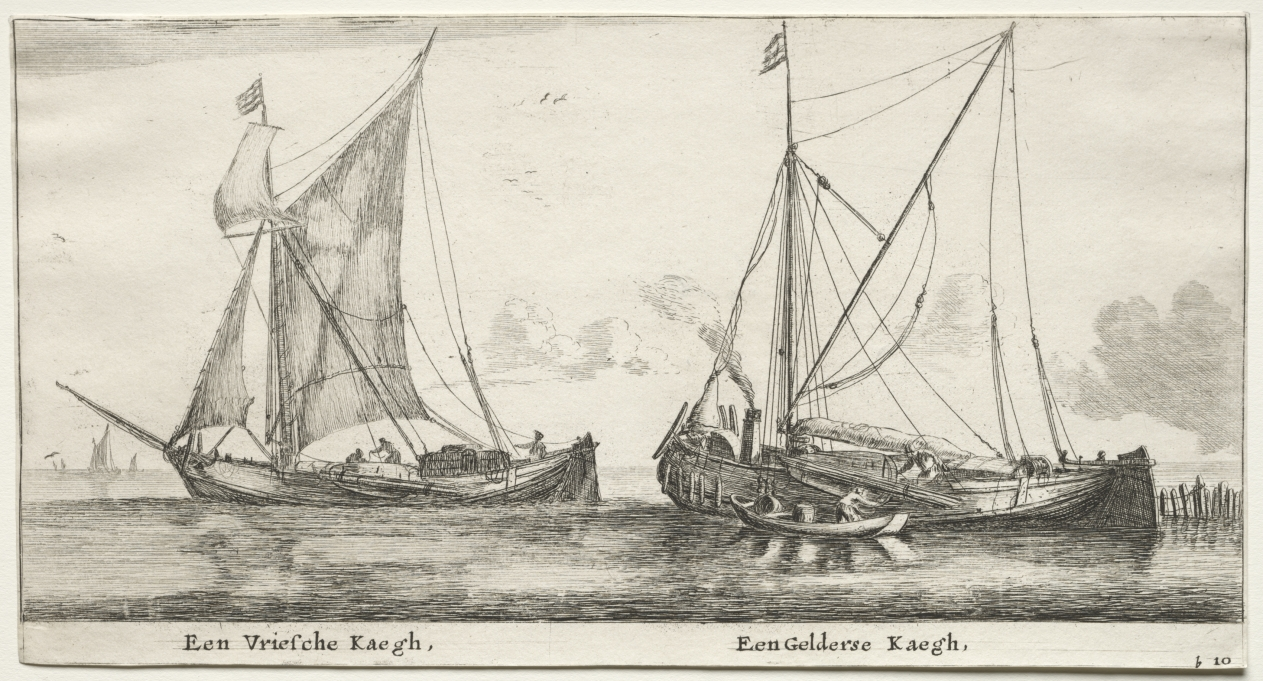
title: Various Ships and Views of Amsterdam (Verscheÿde Schepen en Gesichten van Amstelredam), Part II: A Frisian Bilander. A Geldersche Bilander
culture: Netherlands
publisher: Clement de Jonghe (Dutch, 1579–1679)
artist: Reinier Nooms, called Zeeman (Dutch, c. 1623–1664)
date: 1652–54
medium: etching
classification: Print